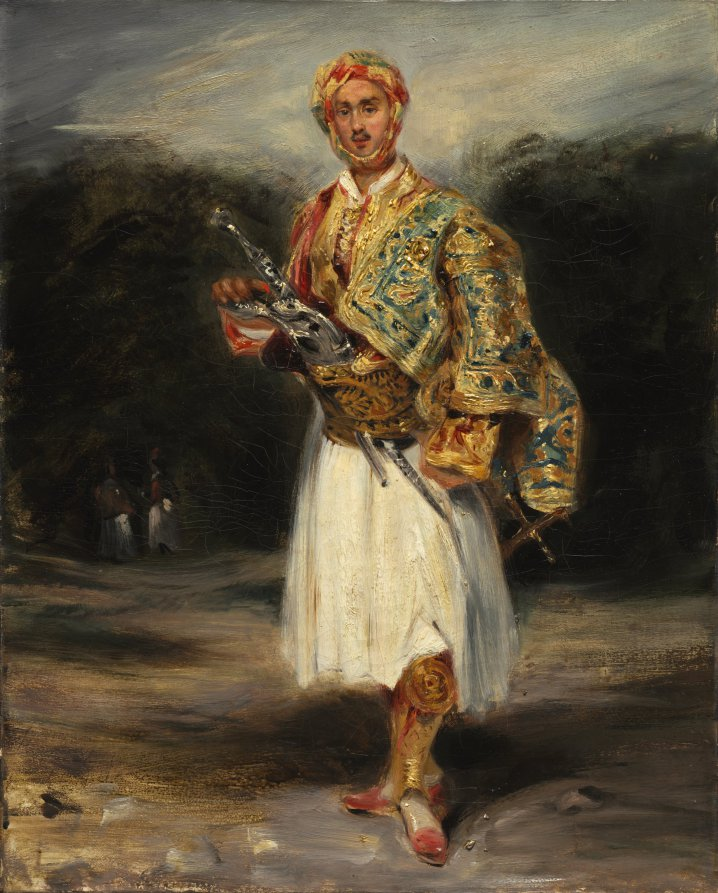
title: Count Demetrius de Palatiano in Suliot Costume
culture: France, 19th century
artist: imitator of Eugène Delacroix (French, 1798–1863)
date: not dated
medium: oil on fabric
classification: Painting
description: The Greek war of independence in the 1820s was a source of great interest for the rest of Europe. The exotic costumes of Greek soldiers, or Palikares, were popular subjects for artists. Count Palatiano was a flamboyant Greek aristocrat who often posed for Delacroix and his colleagues in Paris.